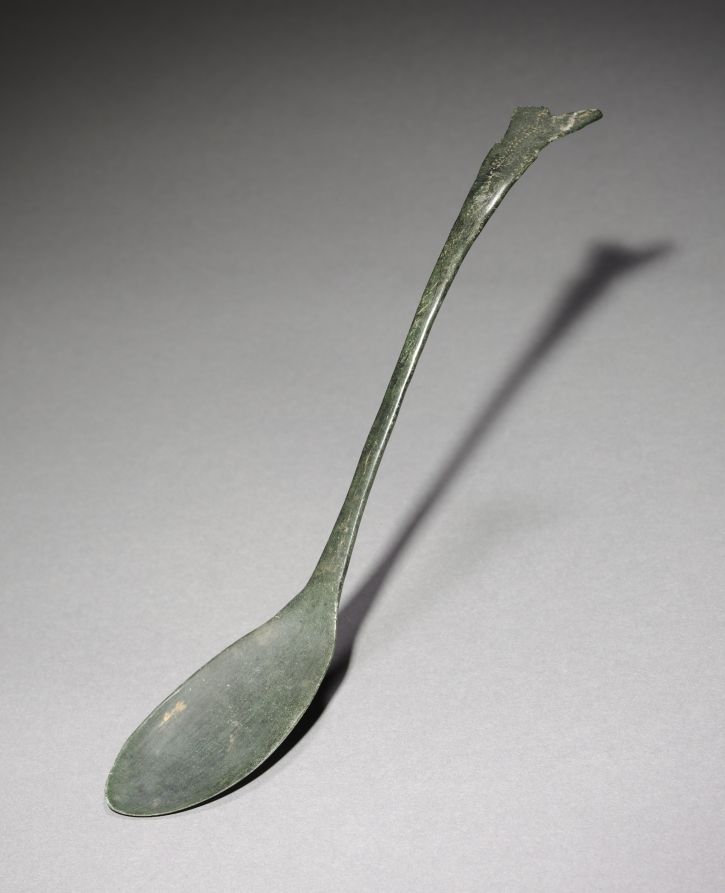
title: Spoon with Fish-Tail Design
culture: Korea, Goryeo dynasty (918–1392)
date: 918–1392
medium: bronze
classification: Metalwork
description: Many of Goryeo period spoons like this one feature a curved handle that splits into a jagged fishtail design. This fishtail design is not unique to Korea; it was also widely used in the area under the rule of two non-Han Chinese states: Liao (907–1125) and Jin (1115–1234). These seemingly ordinary objects testify to exciting material interactions between the Goryeo dynasty and non-Han Chinese northern states, which were often omitted from the official records.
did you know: Bronze spoons are the most common burial item. Scholars have proposed that toward the end of the 1300s, Koreans enjoyed meat-based soups more than any other dishes, explaining why spoons became common household items as well as burial goods.